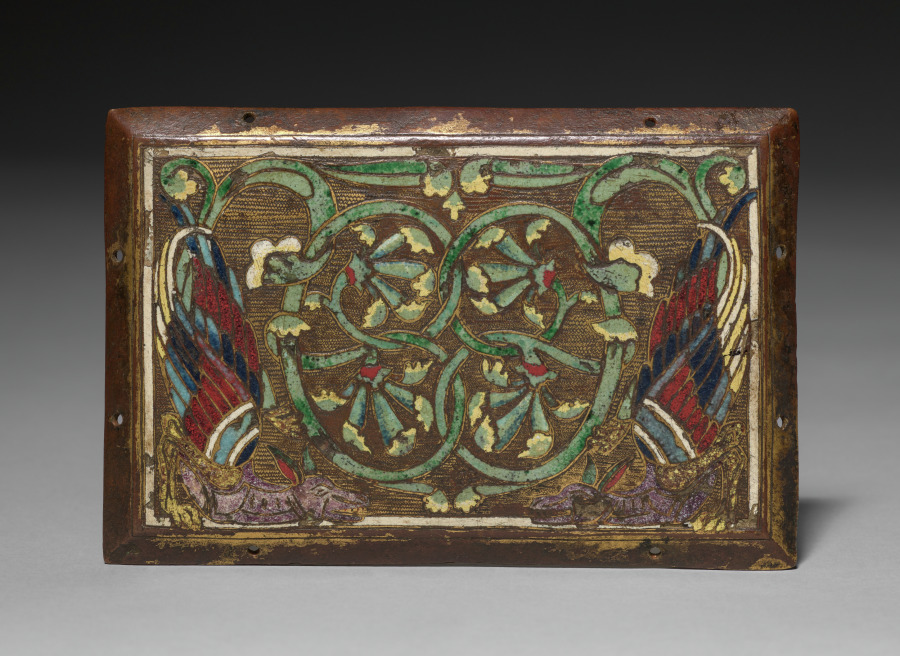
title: Enamel Plaque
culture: 19th century (Forgery)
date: 1800s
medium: champlevé enamel on copper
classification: Enamel